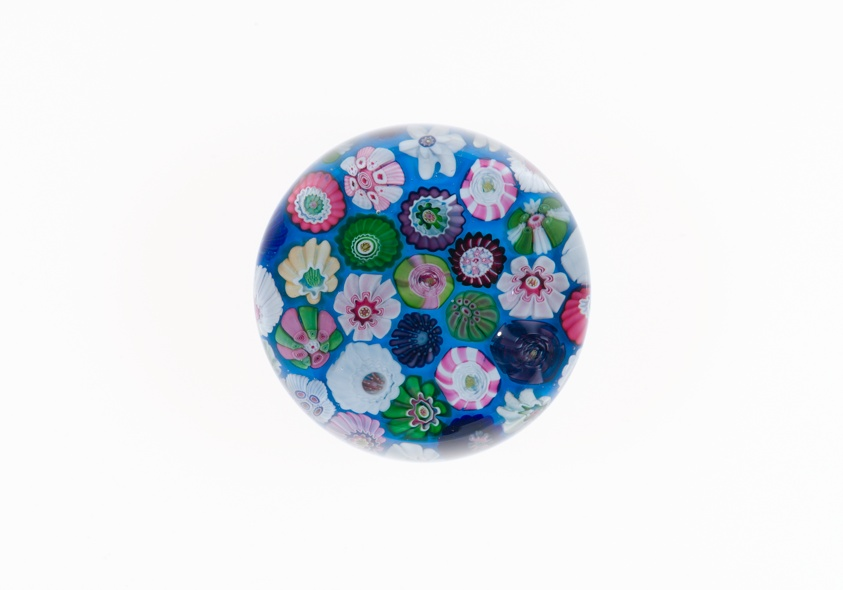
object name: Glass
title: Paperweight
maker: Clichy Glassworks (Cristalleries de Clichy); Clichy, France, 1837-1885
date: 1845/55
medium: Glass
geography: Clichy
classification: paperweight; millefiori; european decorative arts; glass